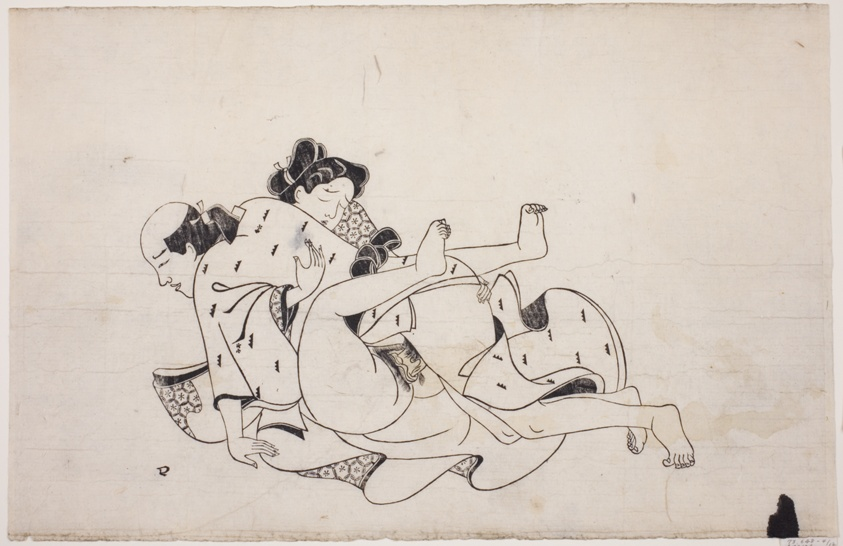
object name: Print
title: A sheet from a shunga album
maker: Japanese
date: 1679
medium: Woodblock print; sumizuri-e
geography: Japan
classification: print